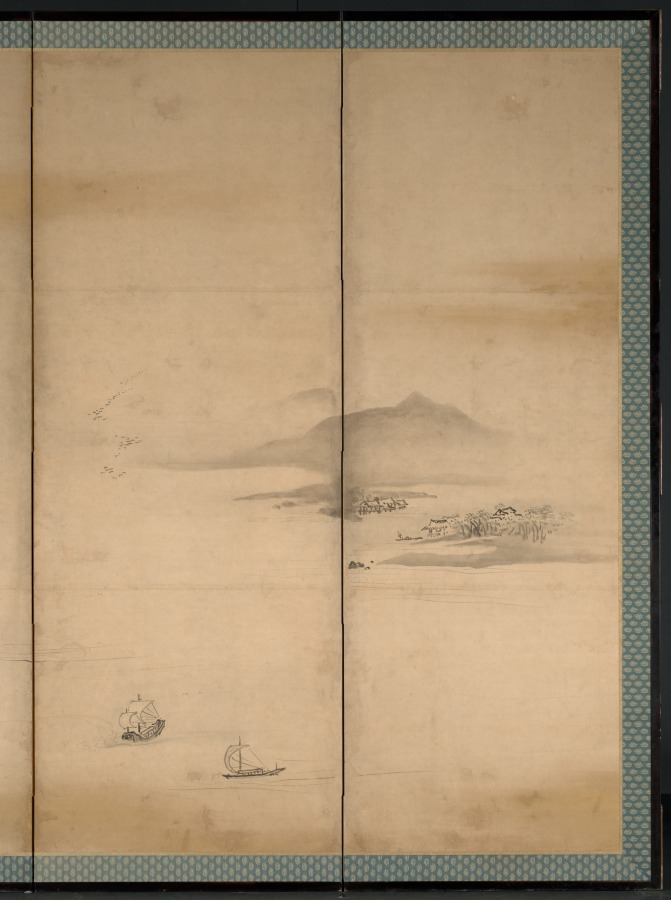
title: The Four Seasons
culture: Japan, Edo period (1615–1868)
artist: Kano Tan’yū (Japanese, 1602–1674)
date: 1668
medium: Six-panel folding screen, ink and slight color on paper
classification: Painting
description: Tan'yū's skills were honed early within the regimen of the Kano family's painting studio. His grandfather, Eitoku (1543–1590) was the Momoyama period's most sought-after painter, a champion of colorful, large-scale painting compositions who worked for several of the country's most powerful leaders. When the young Tan'yū was summoned to Edo in 1617 by the shogun to become a member of the new capital's official painting studio, few opportunities to work on similarly ambitious projects existed. Yet by the end of his career, Tan'yū had supervised the execution and installation of linked mural painting compositions in several of Japan's most prestigious residences and castles. As an official court painter to the first shogun, Tokugawa Ieyasu (reigned 1603–5), and then his successors, Tan'yū appears to have successfully juggled his official duties with private activities as a teacher, as the era's leading connoisseur of classic Chinese and Japanese painting, and as a practicing artist. His surviving compositions as well as thousands of sketches far surpass the oeuvre of any of his contemporaries. While studio assistants surely contributed to his oeuvre, just as later imitators consciously confused his accomplishments, a clearer image of the painter has emerged in recent years that better conforms with his contemporary acclaim as recorded in seventeenth- and eighteenth-century documents. Tan'yū can now be seen as an artist adept in virtually all traditional ink painting subject matter, which he often presented in novel interpretations. Equally important are his rare screen (byōbu) compositions executed in a pure yamato-e manner with vivid mineral pigments on a gold-foil background. This pair of byōbu presents Tan'yū's more orthodox approach to academic ink painting methods embracing Chinese themes that had been interpreted by numerous Japanese ink painters over the centuries. Thus a typical view of residences and human activities set along the shores of an impressive river (or lake) is enlivened by the Japanese proclivity for including seasonal references. Proceeding from right to left, the viewer passes sequentially from spring to the snow-laden branches of winter. Tan'yū lends considerable atmospherics to the panorama in his use of misty cloud banks, frequently set off by sharp, darkened ink lines or whole areas of ink washes of variegated tonalities. The spring and summer views are particularly notable in this regard, as is the presence of the artist's signature on both byōbu, attesting to their completion in Tan'yū's sixty-seventh year (1668)—50 years after he left Kyoto for the capital, and 30 years following his adoption of the artist name "Tan'yū" (in 1635). From 1622, when he began work on the mural paintings for Edo castle (the shogun's formal residence), through the completion of the painting cycle in 1636 for the Tokugawa family mausoleum in Nikkō to the north of Edo, Tan'yū's skills as head of an accomplished painting studio as well as a master painter found their most impressive expression in large-scale compositions. In 1638 he received the honorary Buddhist title Hōgen (Eye of the Law). It is intriguing therefore that relatively few independent byøbu paintings from the master's hand survive, particularly documented early works.